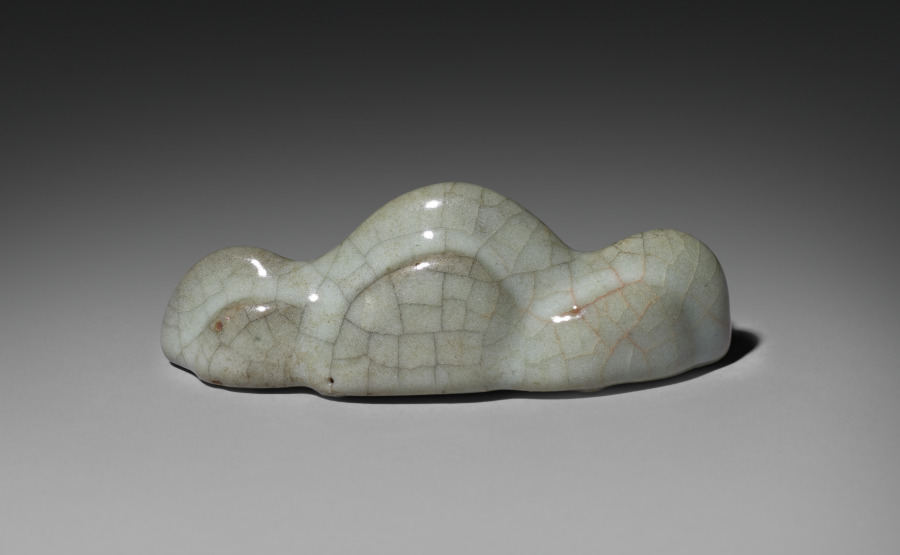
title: Brush Rest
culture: Southeast China, Zhejiang province, Southern Song dynasty (1127–1279)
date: 1127–1279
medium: glazed stoneware, Guan ware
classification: Ceramic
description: This brush rest, shaped like a mountain range, is covered with a thick and soft gray-blue crackled Guan ware glaze that pools in the deeper areas, giving the mountain range a hazy appearance as if enshrouded in white mists. Guan ware was produced in the imperial kilns in Hangzhou, the Southern Song dynasty capital.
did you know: There are twelve "hills" on this mountain-shaped brush rest.